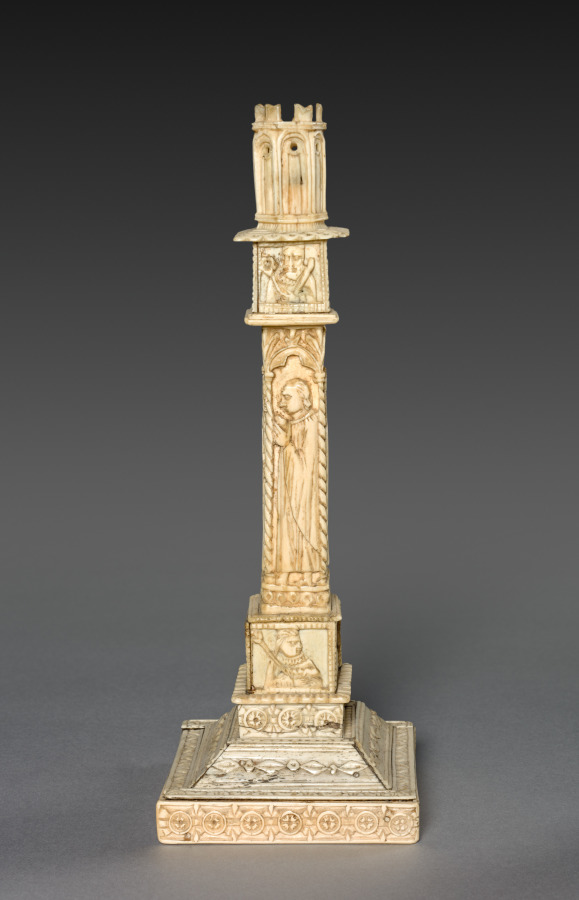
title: Candlestick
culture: Italy, 15th century style (possibly 19th-early 20th century)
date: 1800s - early 1900s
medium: ivory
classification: Ivory